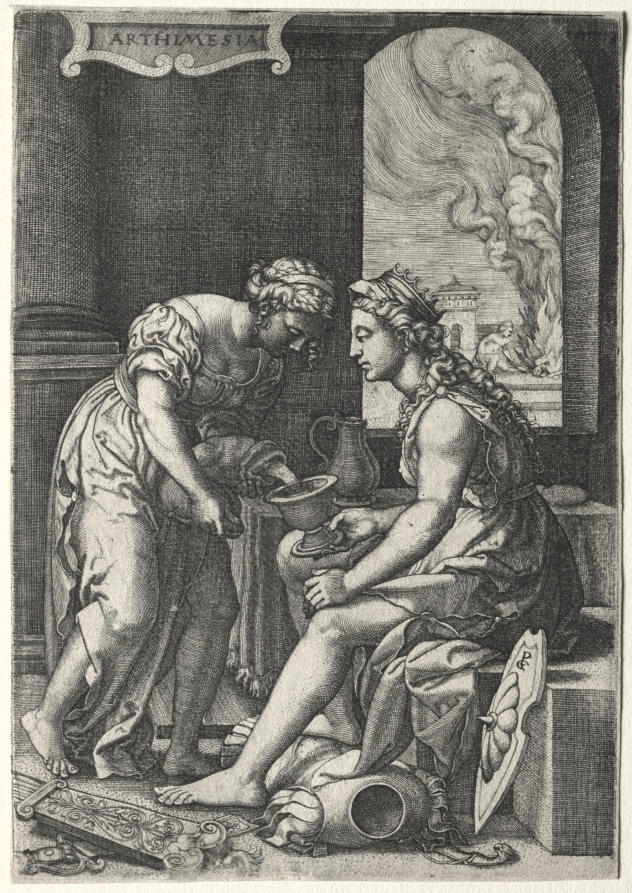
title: Artemisia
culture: Germany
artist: Georg Pencz (German, c. 1500–1550)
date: c. 1539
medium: engraving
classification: Print